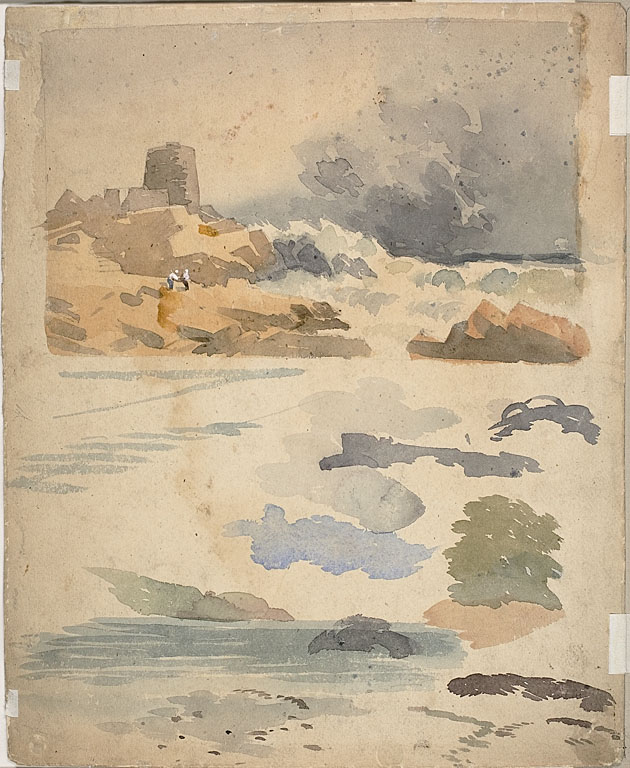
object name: Drawing and Watercolor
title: Sketches of Marine Scenes (recto); Two Sketches: Beside Stormy Coast, Cloudy Seascape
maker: Attributed to Édouard Manet; French, 1832-1883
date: 1852/83 (recto); c. 1871 (verso)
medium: Watercolor and graphite (recto), and watercolor with traces of graphite, heightened with touches of white gouache (verso), on off-white wove paper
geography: France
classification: drawings (visual works); prints and drawing